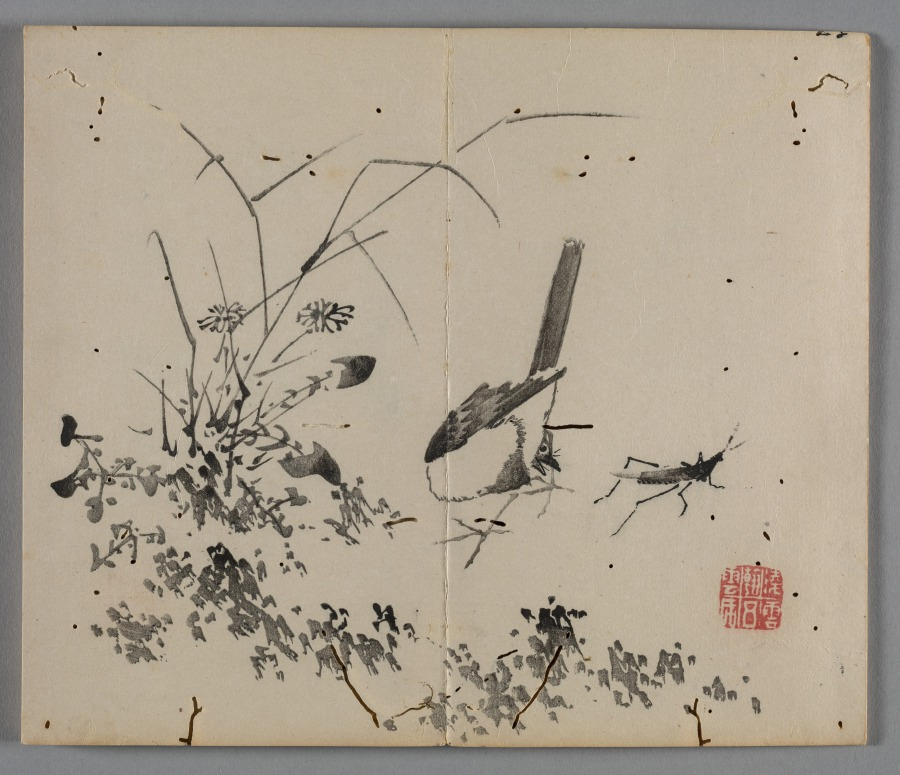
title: Ten Bamboo Studio Painting and Calligraphy Handbook (Shizhuzhai shuhua pu): Birds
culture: China, Qing dynasty (1644-1911)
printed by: Hu Zhengyan (Chinese, c. 1584–1674)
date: 1633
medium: Woodblock-printed book; ink and colors on paper; first edition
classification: Print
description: Color printing reached a level of perfection in the early 1600s, as seen in this Ten Bamboo Studio Collection of Calligraphy and Painting and the Mustard Seed Garden Manual of Painting (printed 1679 and 1701). The painterly quality, precision in registering (aligning) the woodblocks, and harmonious colors made them the most successful color print editions in Chinese history. Both editions were printed and compiled in Nanjing, spread nationwide, and had a great impact on the arts in Japan and Korea.